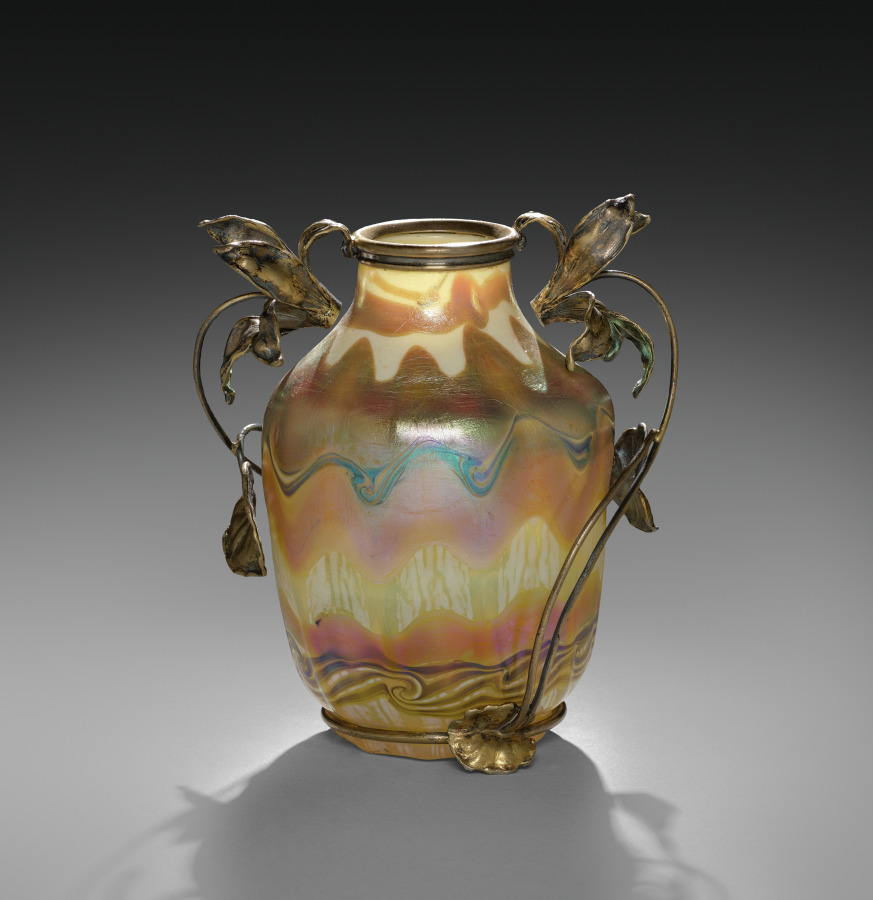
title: Vase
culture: America, New York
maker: Tiffany Glass & Decorating Company (America, New York, 1892–1902)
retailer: Siegfried Bing (German, active in France, 1838–1905)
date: c. 1900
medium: Favrile glass, silver mount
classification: Glass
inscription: Louis C. Tiffany o10301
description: This small vase is made of Louis Comfort Tiffany's signature Favrile glass. Early on when Tiffany began collaborating with glass artists on new types of production, his aesthetic ambitions were realized in the development of Favrile glass, deliberately named to sound French, expensive, and “handmade.” Largely through Tiffany's marketing ability, Favrile glass became America’s greatest contribution to the Art Nouveau style. His works were exhibited at international expositions; galleries in major European cities, where his creations were bought by many museums; and in his store in Manhattan, known as the Tiffany Glass and Decorating Co., later Tiffany Studios. Along with the many shapes and sizes of his decorative vases, Tiffany used Favrile glass in mosaic panels, stained glass windows, and his artistic line of table and floor lamps.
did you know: This vase has French mounts indicating that it was likely sold by Louis Comfort Tiffany's agent in Paris, Siegfried Bing, who helped popularize Tiffany's designs throughout Europe.